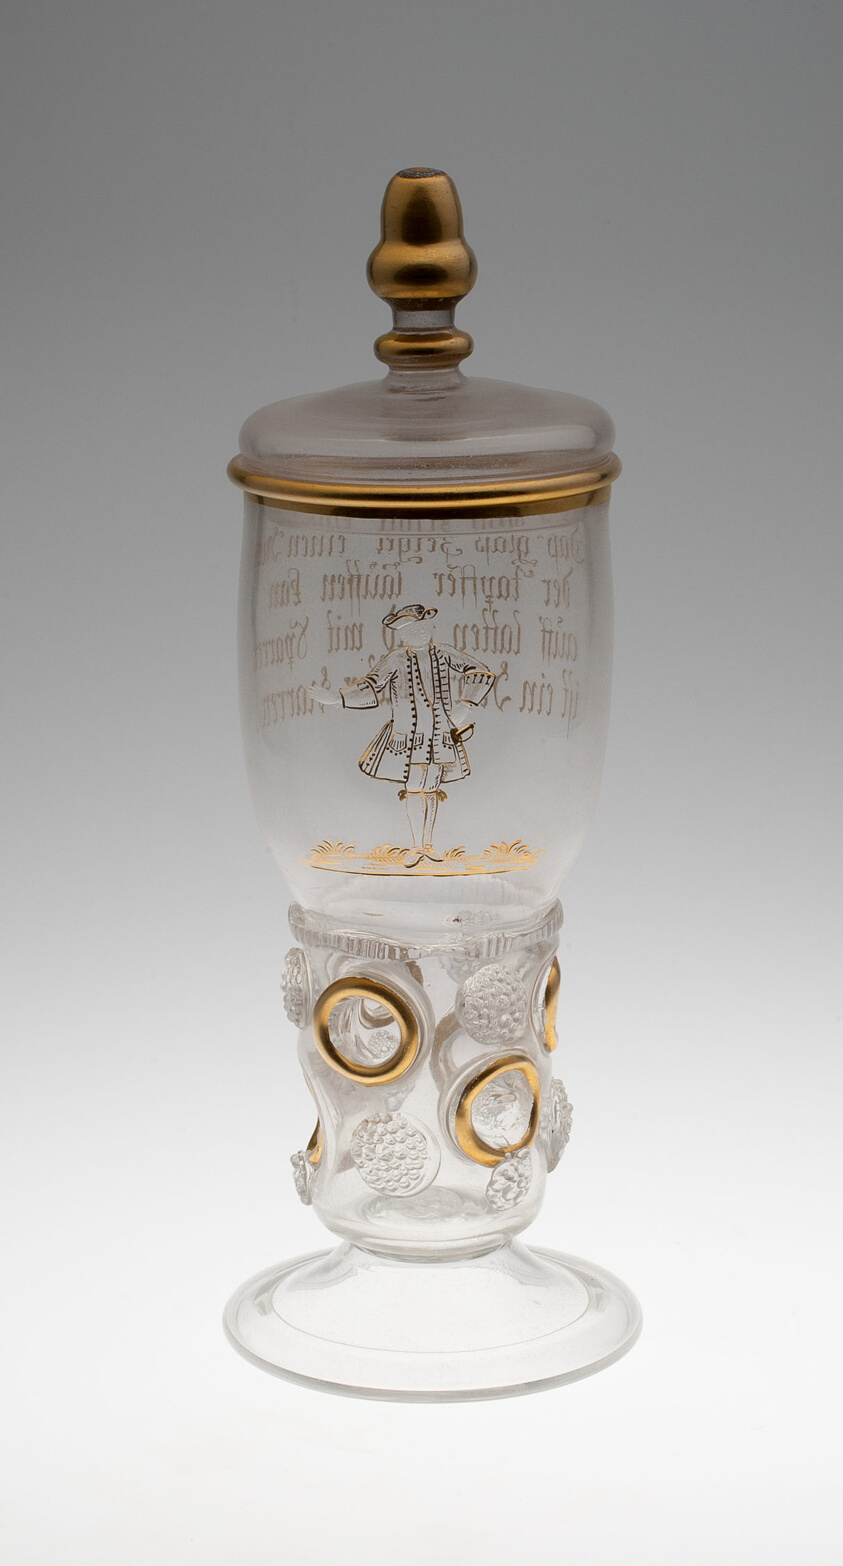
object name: Glass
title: Covered Roemer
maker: Germany, Brandenburg, Zechlin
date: 1730/45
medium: Glass with gilding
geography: Germany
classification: drinking vessel; glass; european decorative arts